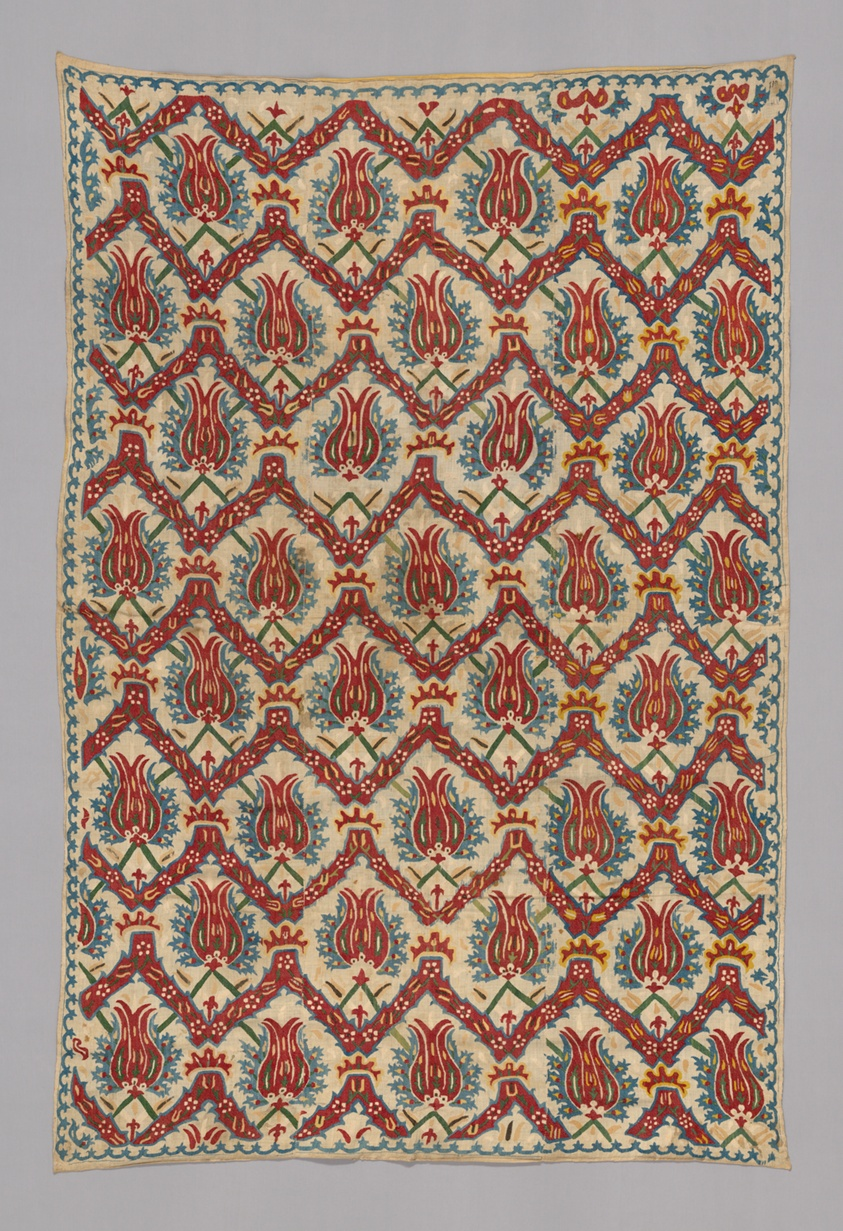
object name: Textile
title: Cover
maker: Turkey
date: 1600/1775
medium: Linen embroidered with multicolor silk.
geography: Turkey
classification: textile; needlework (visual works); weaving